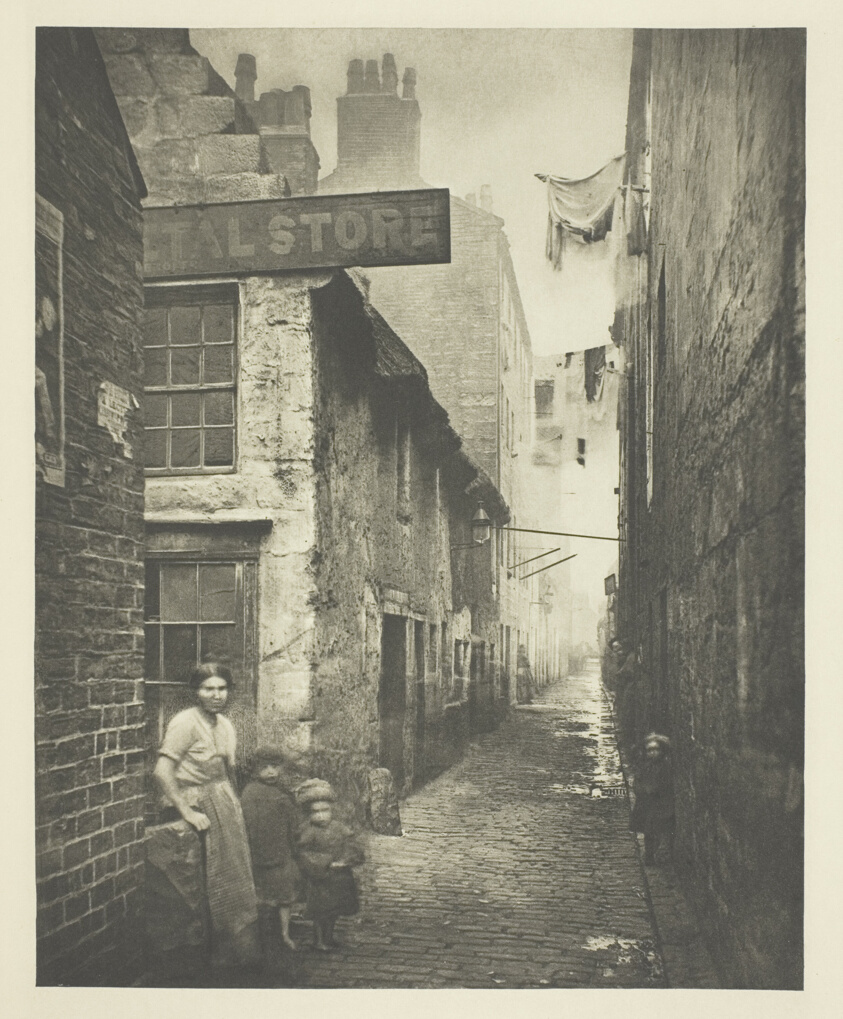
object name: Photograph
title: Old Vennel off High Street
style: 19th century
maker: Thomas Annan (Scottish, 1829–1887)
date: 1868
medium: Photogravure, plate 2 from the book "The Old Closes & Streets of Glasgow" (1900)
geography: Scotland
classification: photograph; photography